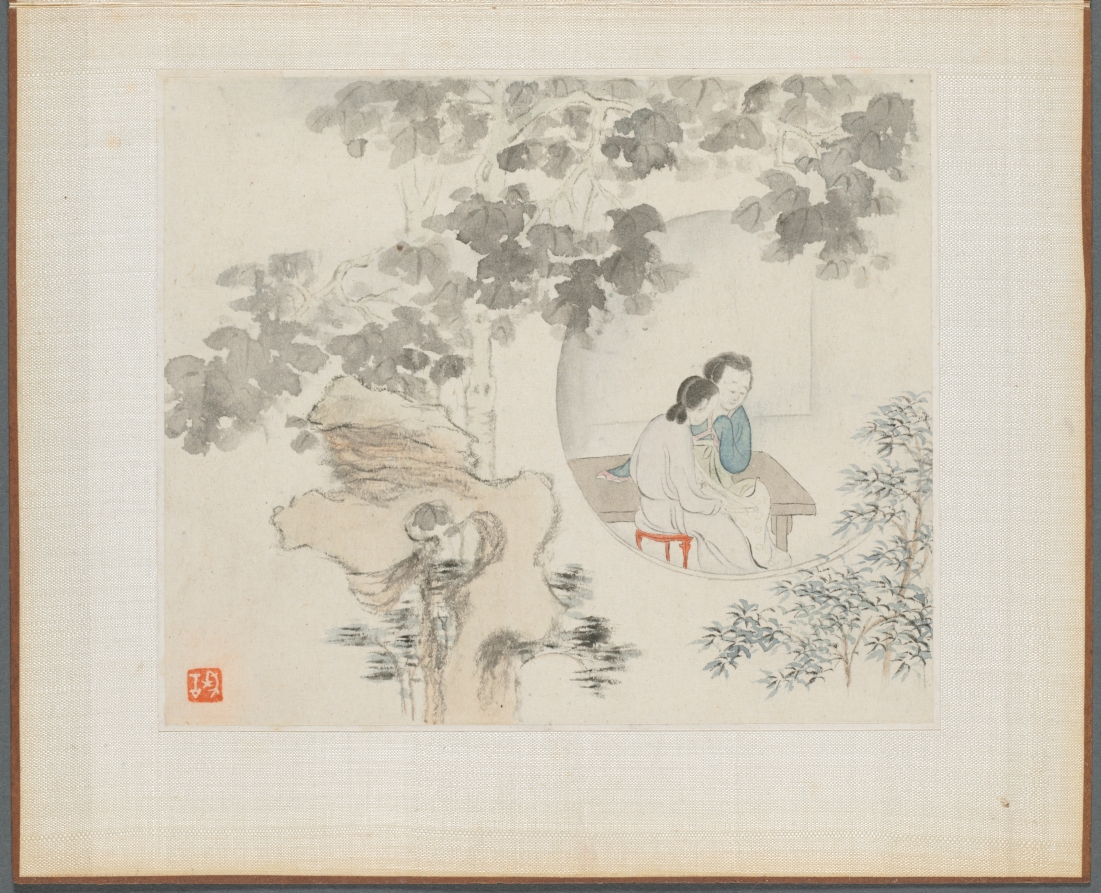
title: Album of Landscape Paintings Illustrating Old Poems: Two Women with Needlework in a Garden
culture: China, Qing dynasty (1644-1911)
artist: Hua Yan (Chinese, 1682–c. 1765)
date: 1745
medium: Album leaf; ink and light color on paper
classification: Painting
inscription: Seal, lower left corner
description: Two women doing needlework are confined in an interior space. The other 11 paintings in this Hua Yan album show men in nature. The women may experience the natural world only through the large moon-shaped window open to a garden. Prominently displayed in the garden is a Taihu stone, like CMA 2022.23. Taihu stones are valued for their natural shapes and sculptural qualities and are a cultural peculiarity. These perforated limestones were originally sourced from Lake Tai in southeast China from where they got their names. Large ones were set up like sculptures in gardens, like the one in this painting.